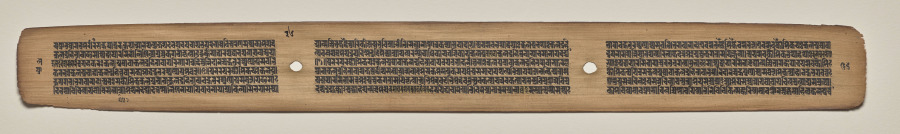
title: Text, Folio 36 (verso), from a Manuscript of the Perfection of Wisdom in Eight Thousand Lines (Ashtasahasrika Prajnaparamita-sutra)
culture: Eastern India, Bihar, Vikramashila Monastery. Painting: Nepal, Kathmandu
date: Sunday, September 14, 1119 (year 239 of the Newar Samvat in the month of Ashvina)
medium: gum tempera and ink on palm leaves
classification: Painting